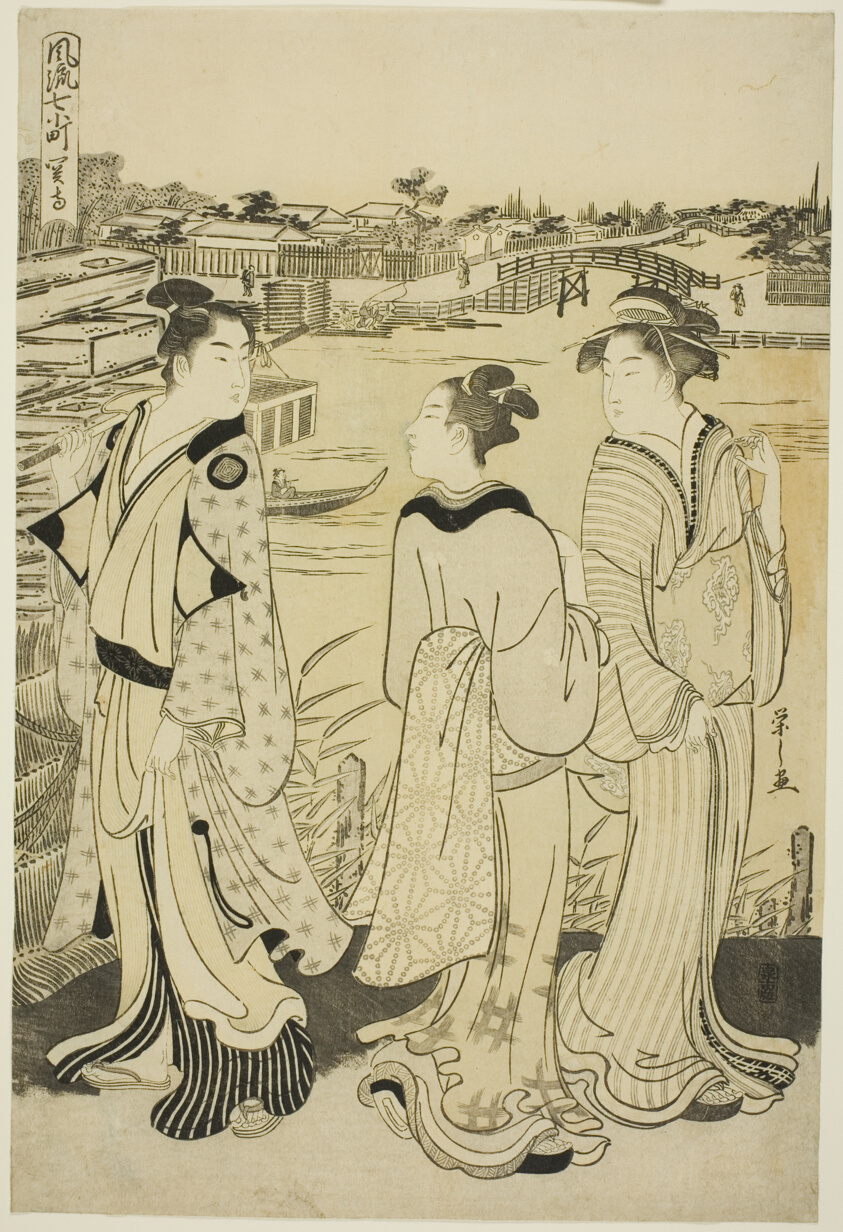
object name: Print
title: Ono no Komachi at Seki Temple, from the series The Fashionable Seven Komachi (Furyu nana Komachi)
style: Japanese (culture or style)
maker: Chobunsai Eishi; Japanese, 1756-1829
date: Edo period (1615–1868), about 1788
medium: Color woodblock print; oban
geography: Japan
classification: woodblock print; print; asian art